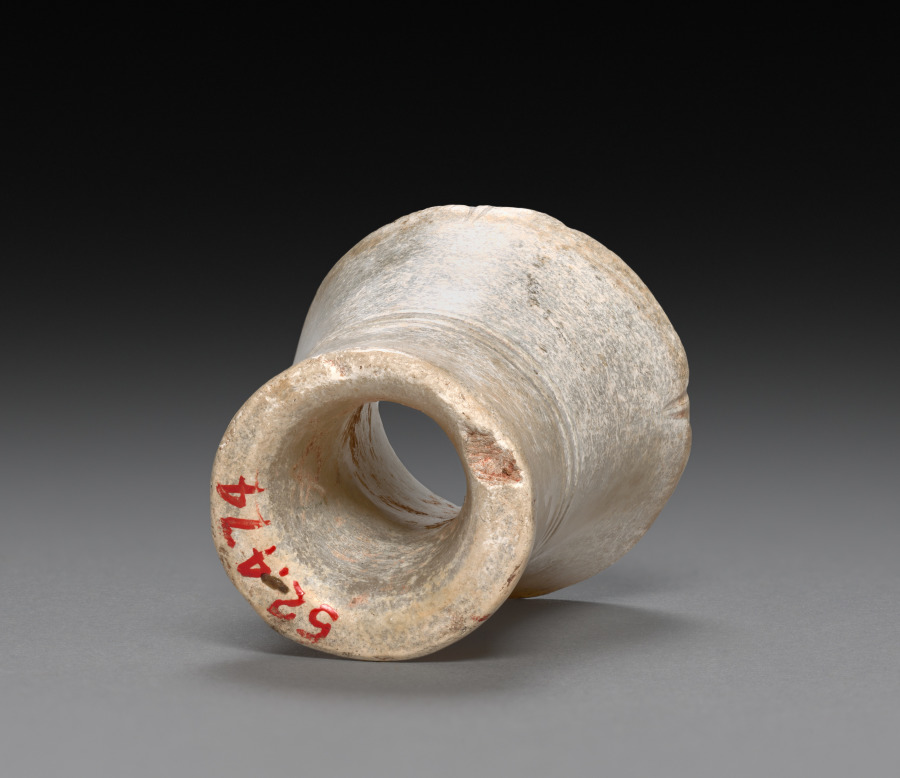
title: Bead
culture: China, Shang dynasty (c. 1600–c. 1046 BCE) to Zhou dynasty (c. 1046–256 BCE)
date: c. 1200–900 BCE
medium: jade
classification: Jade